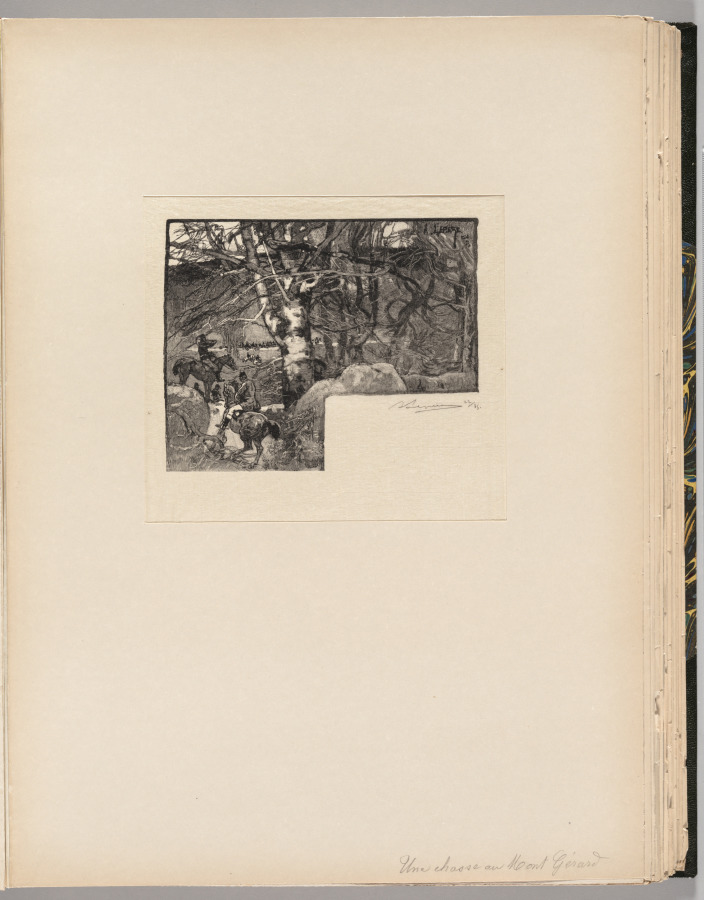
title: Fontainebleau Forest: Ride to the Hounds at Mont-Gérard (La Forêt de Fontainebleau: Une chasse au Mont-Gérard)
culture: France, 19th century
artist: Auguste Louis Lepère (French, 1849–1918)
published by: A. Desmoulins, Published in Revue Illustrée, 1887–90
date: 1890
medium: wood engraving from bound volume of 34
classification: Bound Volume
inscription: Below image, lower right, in black ink: ALepère 22/35; on window mat, lower right, in graphite: Une chasse au Mont Gérard